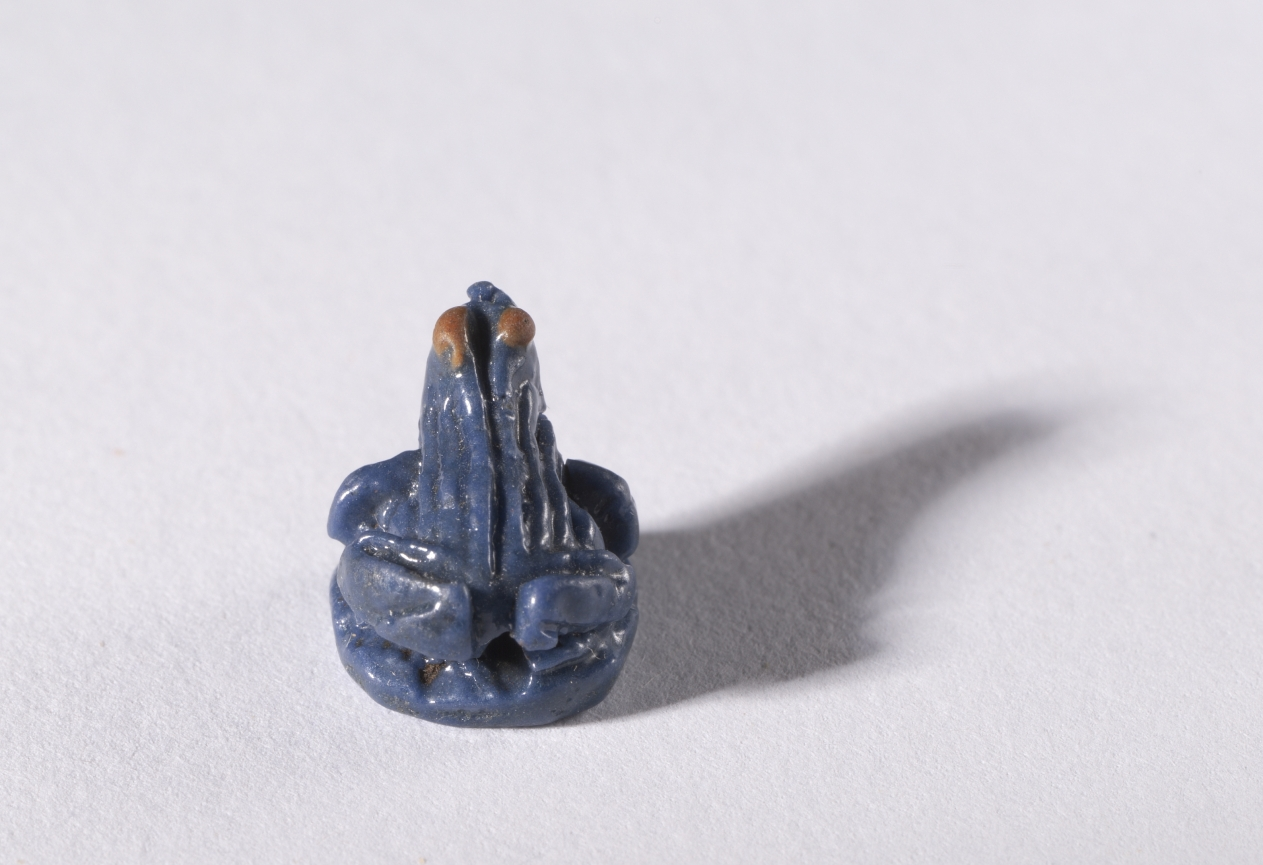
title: Frog Amulet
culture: Egypt, New Kingdom (1540–1069 BCE), Dynasty 18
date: c. 1380–1330 BCE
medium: polychrome faience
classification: Amulets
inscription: Inscribed "Nefer" (beautiful)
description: The frog, because of its numerous offspring, was a symbol of fertility. In fact, the hieroglyphic sign for 100,000 was a tadpole. Frog amulets were very popular both in semiprecious stone and in faience, and were worn by women hoping for an easy delivery. Both sexes wore the frog in expectation of a successful rebirth in the afterlife.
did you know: This frog amulet was made from faience, a fine type of self-glazing ceramic that is characteristically turquoise blue. It is a representation of Heqet, the frog goddess associated with childbirth and fertility.